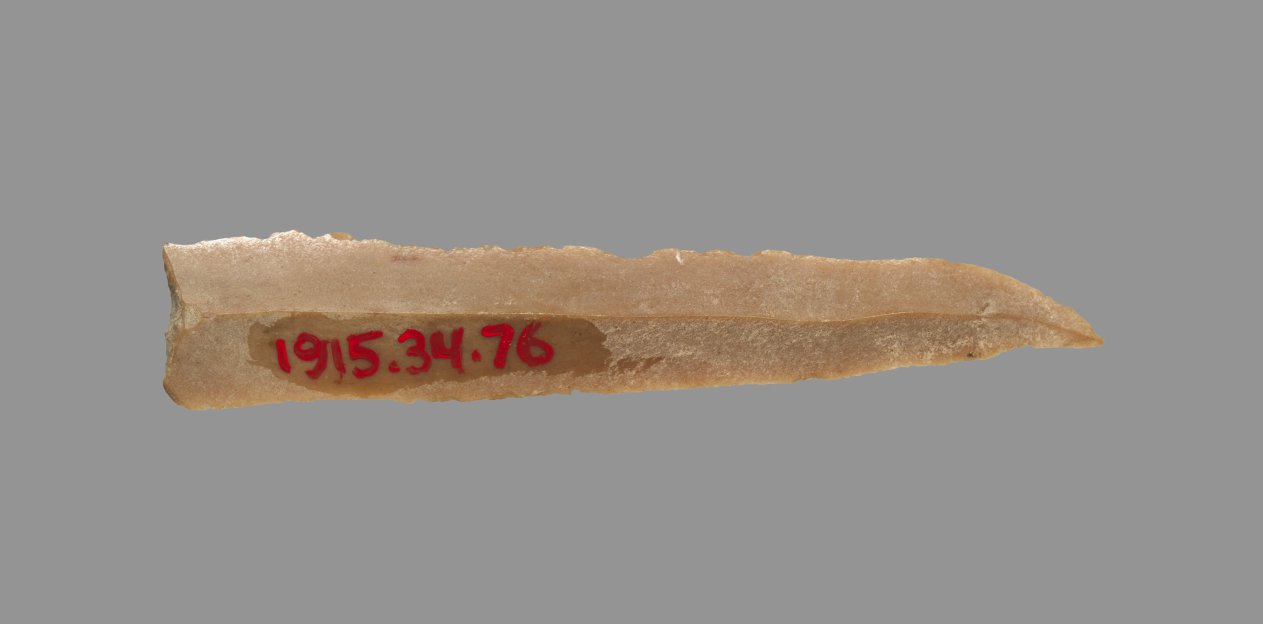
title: Sickle Blade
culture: Egypt, Middle Kingdom (2040–1648 BCE), Dynasty 12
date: 1980–1801 BCE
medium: flint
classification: Implements